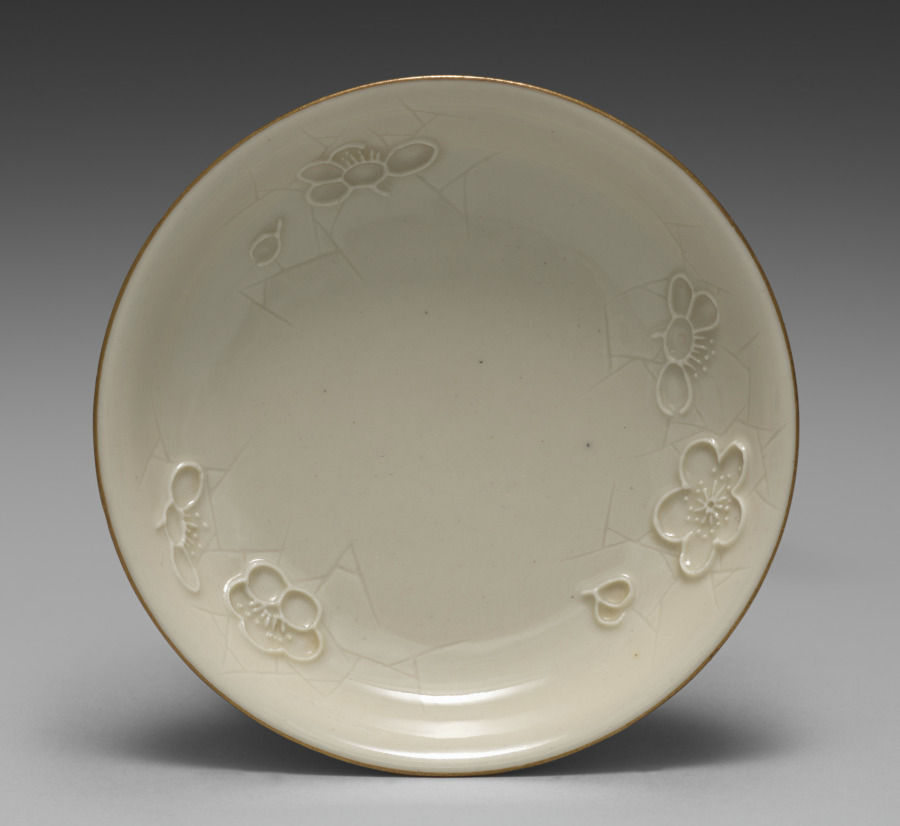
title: Small Dish from Dining Set with Plum Blossoms and Cracked-Ice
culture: Japan, Meiji period (1868–1912)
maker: Seifū Yohei II (Japanese, 1844–1878)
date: c. 1875–78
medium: Porcelain with molded designs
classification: Ceramic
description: Each item in this set has a delicate low-relief design of flowering plum branches over scattered, intersecting lines meant to resemble the cracked-ice surface of a frozen body of water and is signed on the base in gold pigment. While Yohei II produced many fine works in underglaze blue, like those produced by Kiyomizu Shichibei, he also made works in quite different styles later in his career, from the early 1870 s. In 1873, he was appointed purveyor to the Industrial Center of Kyoto Prefecture, a designation associated with Kyoto’s efforts to reach an international market through the port of Kobe; and from 1875 until his death, he was involved in national-level projects to present Japanese ceramics across the world. It was during this period that Yohei III was apprenticed to Yohei II, and it has been suggested that this set may in fact be an early example of Yohei III’s work, which he signed with his teacher’s name. Decorated with flowers resembling Japanese textile motifs, the set calls to mind the design of Yohei II’s pair of vases with plum blossoms in the Victoria and Albert Museum. Here, the elaborate trees created for a formal public exhibition setting have been translated into the approachable blossoms of the genteel domestic environment. While the designs are consistent across the pieces, each raised flower petal and pistil and each incised line in the ice was done by hand, so the cups, bowls, and dishes are similar yet unique. The bottoms of two boxes once identified the set’s owner, but the information has been deliberately obscured with black ink. However, inscriptions still visible appear to indicate two occasions, once at the end of July 1886 , and once again in June 1916 , when parts of the set were requested from Hokura in Niigata Prefecture. The location corresponds to a neighborhood in the present-day city of Jōetsu. The surname Tsuji 辻 also appears on a paper tag affixed to one of the box cloths. Future research may possibly reveal more about their provenance. A vase by Yohei III in a private collection combines the formal grandeur of the Yohei II vases in the Victoria and Albert Museum with the gentler design of this dining set, placing flowering plum trees against soft, scalloped-edge clouds resembling those in golden screens.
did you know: The dining wares have a creamy white coloration that the four boxes containing them identify as Korean in style.